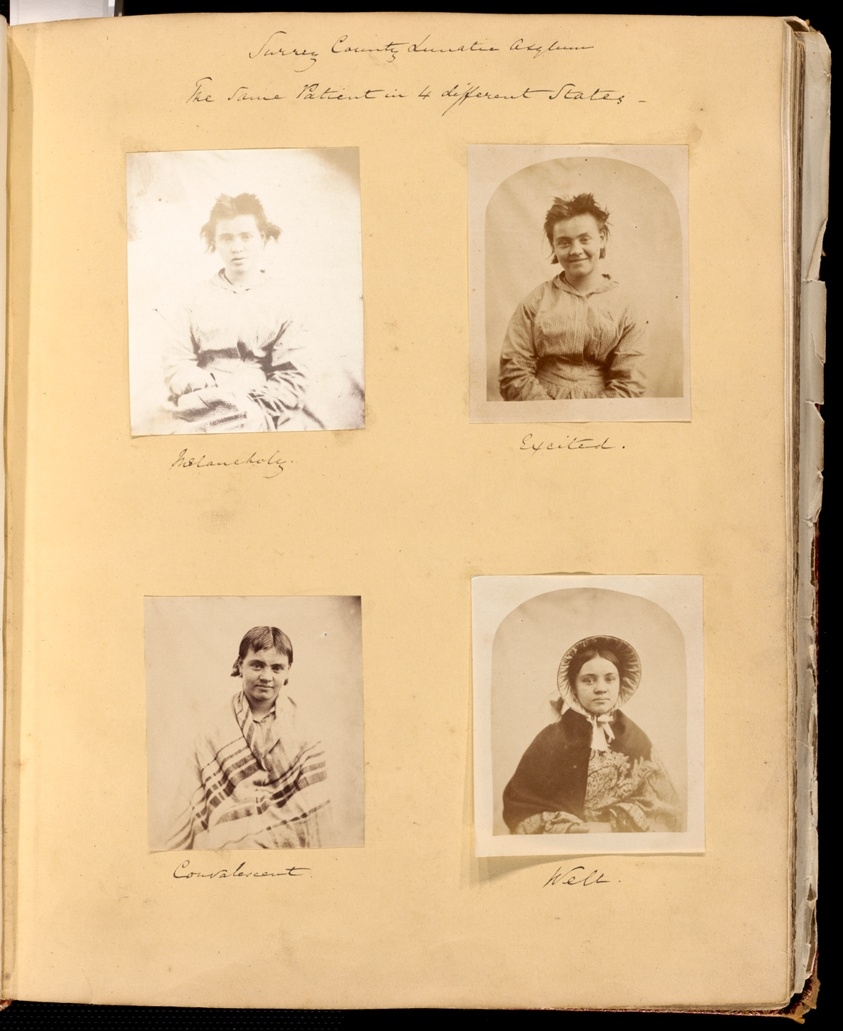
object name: Photograph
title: Surrey County Lunatic Asylum, The Same Patient in 4 Different States: Melancholy, Excited, Convalescent, Well Untitled, 1849–60, from the George Cowper Album, assembled 1849–60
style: 19th century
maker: Hugh Welch Diamond (English, 1809-1886)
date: 1849-1860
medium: Albumen prints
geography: England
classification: photograph; albumen silver print; photography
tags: Collected by Hugh Edwards